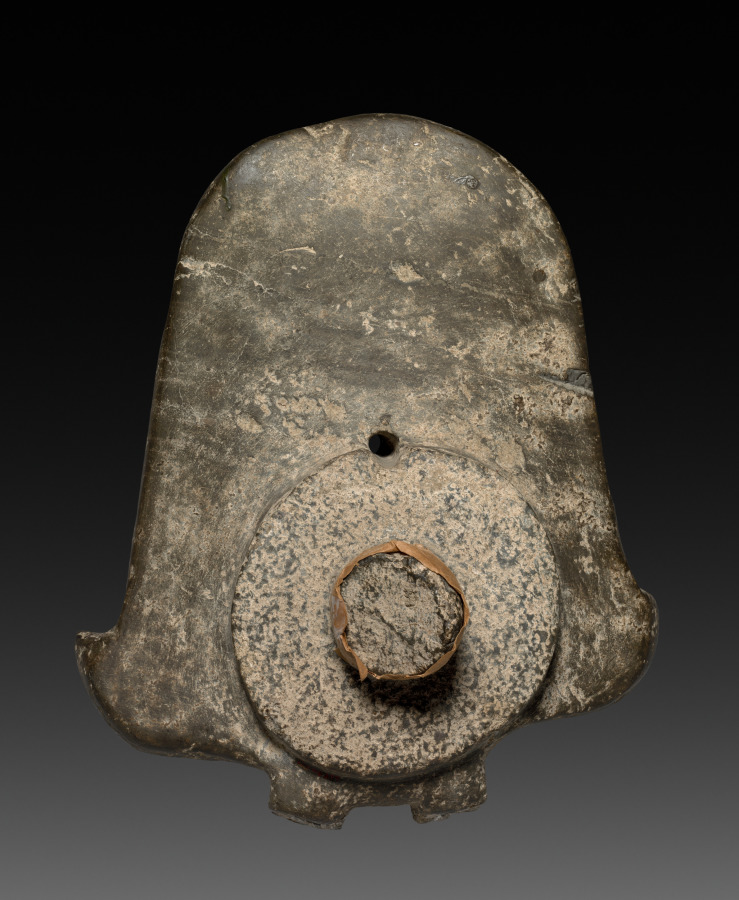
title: Bracket with Buddha and a Pair of Acolytes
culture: Thailand, Mon-Dvaravati style, probably from Nagara Pathama, 8th-9th Century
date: 700s–800s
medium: gray schist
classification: Sculpture